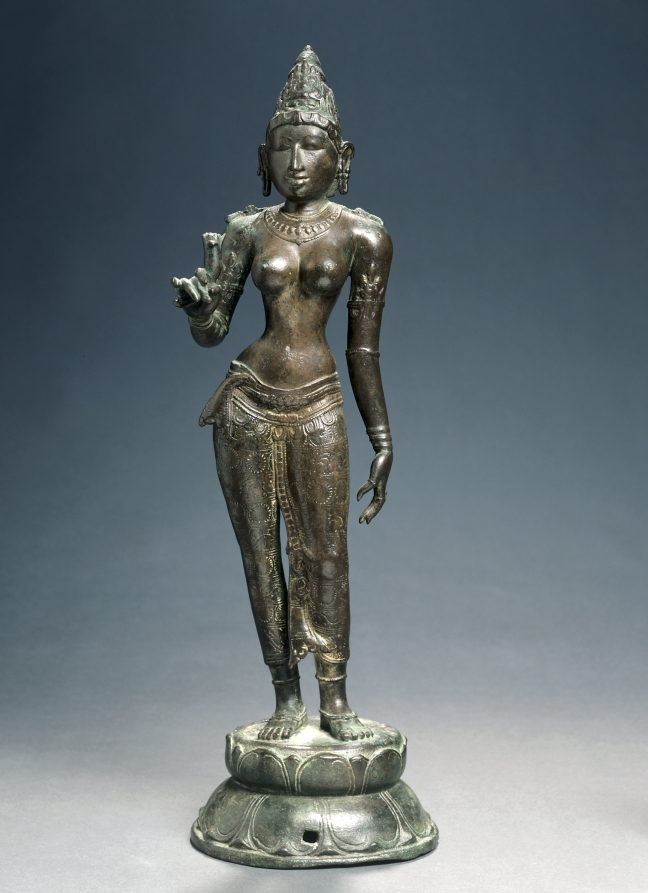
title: Goddess Holding a Lotus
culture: South India, Tamil Nadu, Chola period (900-13th Century)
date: c. 950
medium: bronze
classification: Sculpture